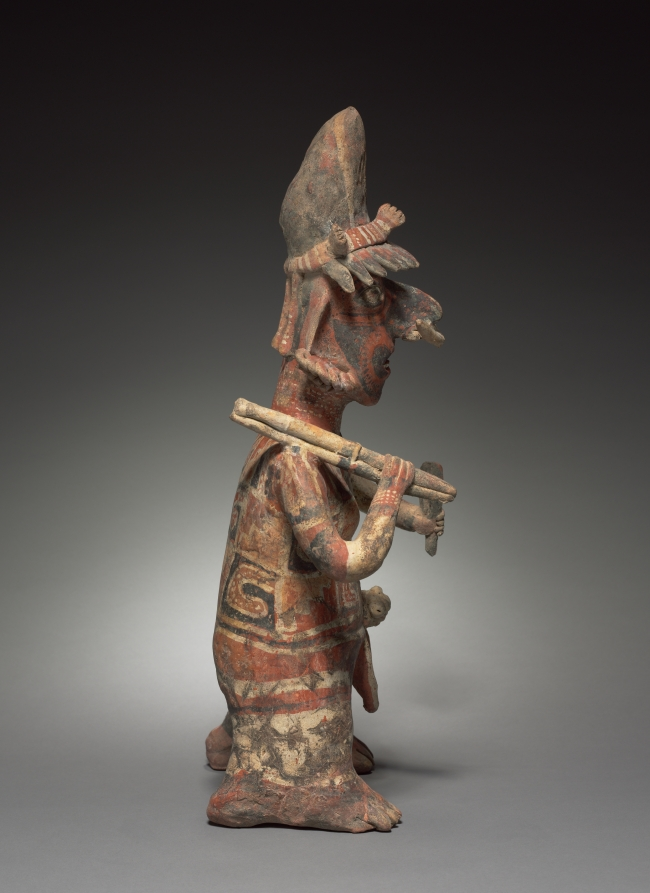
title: Standing Male Figure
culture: Mexico, Nayarit, Ixtlan del Rio Style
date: c. 100 BCE–300 CE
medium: earthenware with colored slips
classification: Sculpture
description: Like his female companion, this male figure is portrayed in all his finery. He carries spears, indicating that he is a hunter or warrior, and his confident grin conveys aggression and vitality.